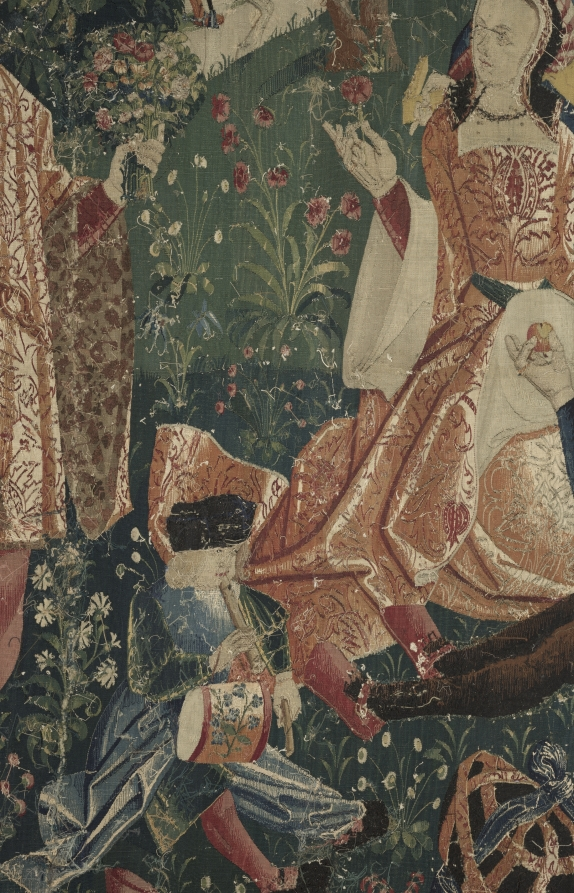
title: Time (from Chateau de Chaumont set)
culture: France, Lyon(?), early 16th century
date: 1512–15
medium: silk and wool; tapestry weave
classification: Tapestry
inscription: French verse in Gothic letters translates as follows: "One sees the weather adorned in green, Sometimes as pleasing as an angel; To suddenly change and be quite strange, The weather never stays the same."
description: Pierre Sala, who likely commissioned the set, is portrayed as the richly attired central figure offering a bouquet, a symbol of knowledge, to Éléonore, his daughter. Éléonore is pregnant, revealed by her upturned skirt and the persimmon in her husband Hector’s hand. Hector’s mother, Marguerite, in dark attire, will wed the widowed Sala in 1519. They appear in front of the royal chateau of Blois. The figures at the right convey Sala’s advice to his children. Time (the old man with the staff) with Clio, the Muse of History, standing on his shoulders, is being attacked by a Herculean youth wielding a stick. With this allegory, Sala is explaining that youth is ignorant of the complexities of life and time. The small unicorn at the far right represents the soul. The verse in Old French at the top refers to changing time: One sees Time adorned with green foliage, Sometimes as pleasant as an angel, Then suddenly change and become quite strange. Never does Time persist in one state.